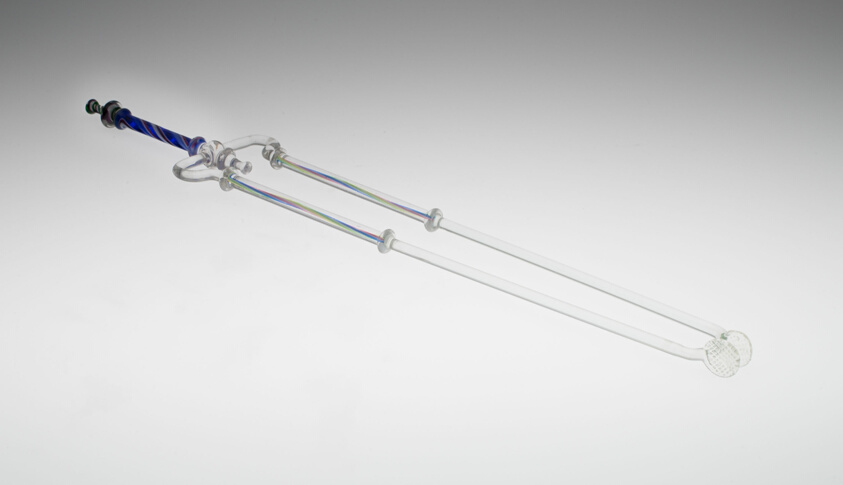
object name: Glass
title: Fire Tongs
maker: England, Bristol or Stourbridge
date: 19th century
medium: Glass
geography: Bristol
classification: fireplace equipment; european decorative arts; glass